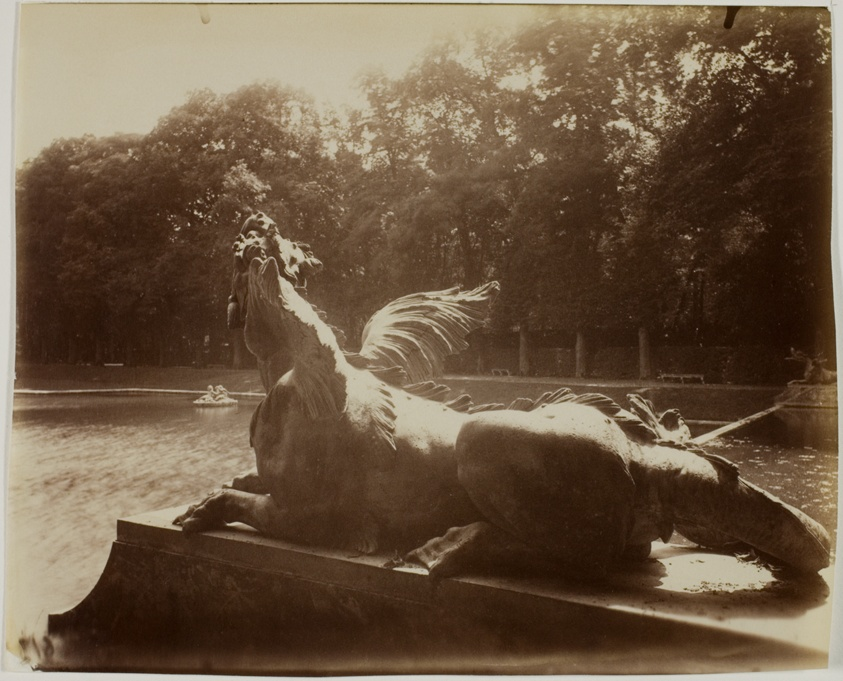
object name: Photograph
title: Versailles, Grand Trianon, Dragon par Hardy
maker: Jean-Eugène-Auguste Atget (French, 1857–1927)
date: 1901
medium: Albumen print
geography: France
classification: albumen silver print; photographic process; photography; photograph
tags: Collected by Hugh Edwards